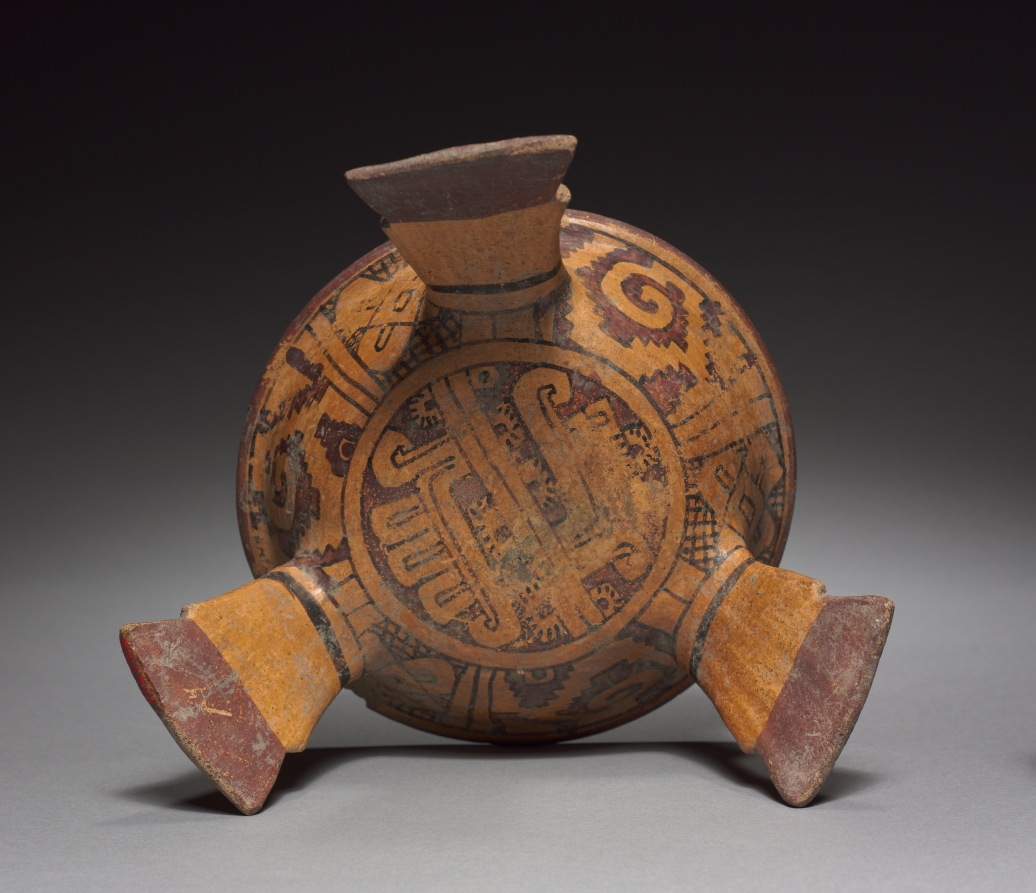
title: Tripod Bowl with Painted Underside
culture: Mexico, Oaxaca, Mixtec, 13th-16th century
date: 1200–1519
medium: pottery with burnished, colored slips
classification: Ceramic